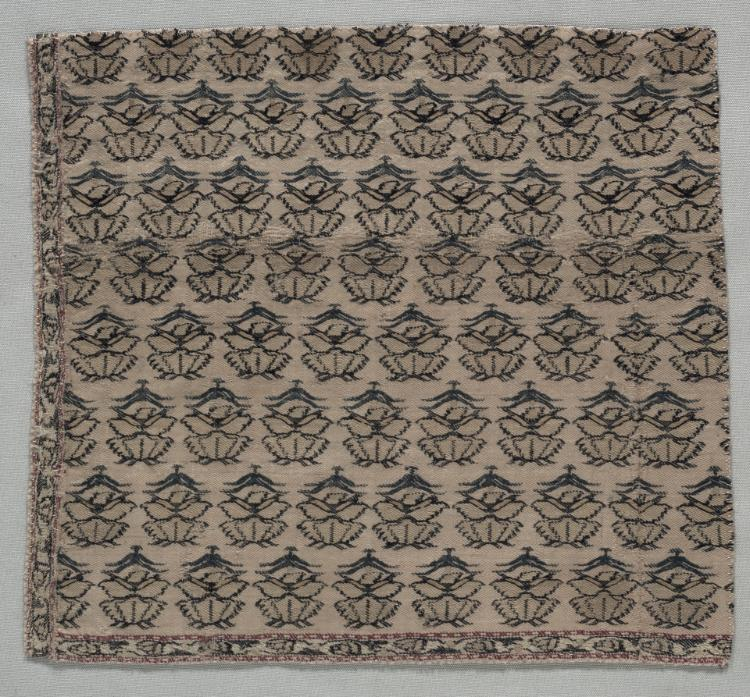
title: Corner Fragment of a Shawl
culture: India, Kashmir, late 18th century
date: late 1700s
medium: tapestry twill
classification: Textile